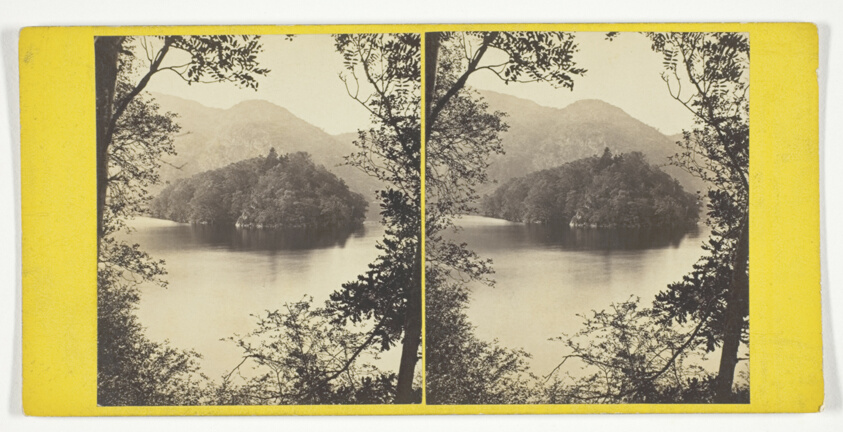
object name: Photograph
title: Ellen's Isle, Loch Katrine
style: 19th century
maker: G. W. Wilson (Scottish, 1823–1893)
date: Mid 19th century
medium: Albumen print, stereo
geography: Scotland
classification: photography; photograph